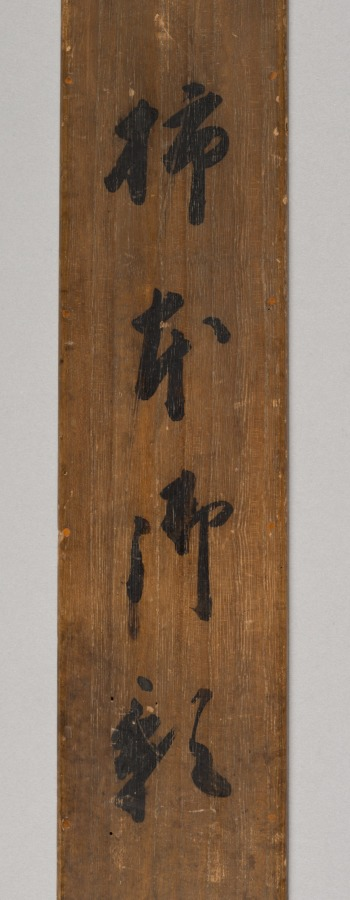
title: Kakinomoto no Hitomaro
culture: Japan, Kamakura period (1185–1333)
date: early 1300s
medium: hanging scroll; ink and color on silk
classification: Painting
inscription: 浦のあさ霧にしま隠れゆく舟をしぞ思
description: Among Japan’s greatest poets, Kakinomoto no Hitomaro’s (c. 660–724) portrait was often displayed at poetry competitions. Here, he gazes up at a falling cherry blossom, his writing box before him, brush and paper in his hands. A short biography and one of his poems are inked on painted rectangles meant to look like decorated papers. The first part of the poem has been mostly lost, but from what remains, it is possible to recognize it as Dimly, dimly in the morning mist that lies over Akashi Bay, my longings follow with the ship that vanishes behind the distant isle. —Translated by Robert H. Bower and Earl Roy Miner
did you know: The landscapes at the top and bottom of the painting depict Akashi Bay, with its famous pines along the shore, and a lone figure in a boat.